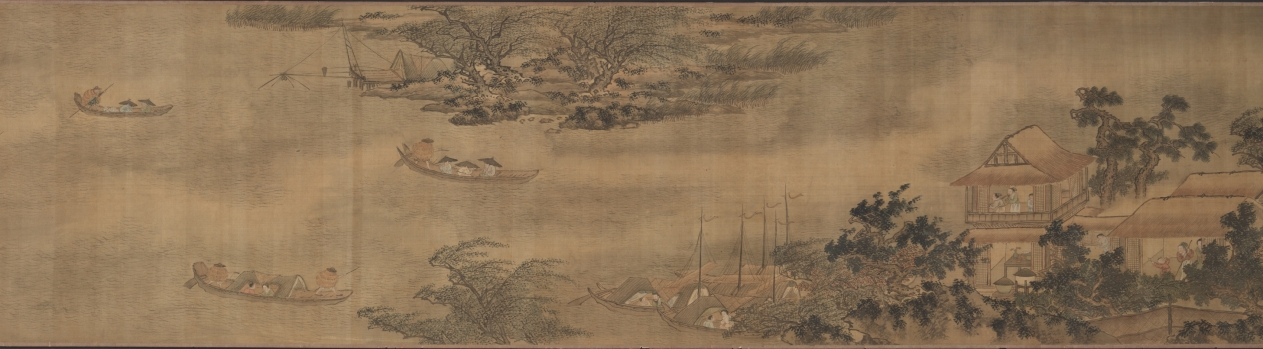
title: Returning to the Village in a Rainstorm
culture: China, Ming dynasty (1368–1644)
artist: Xie Shichen (Chinese, 1487–after 1567)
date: 1530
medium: Handscroll; ink and light color on silk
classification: Painting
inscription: 風雨歸村圖 嘉靖庚寅秋日樗仙謝時臣. [印] 謝時臣印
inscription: 3 additional seals unidentified.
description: This scroll depicts a wind- and rainswept landscape with figures in the countryside struggling against a late summer monsoon rainstorm. Such weather was familiar to residents of the lower Yangzi delta. Xie Shichen spent most of his life in the Suzhou area. Details of his career are scant, but his surviving works suggest that he made his living as a professional painter. This painting conveys drama and anecdotal observations, characteristic of Zhe school paintings, such as the one by Lü Wenying, CMA 1970.76.